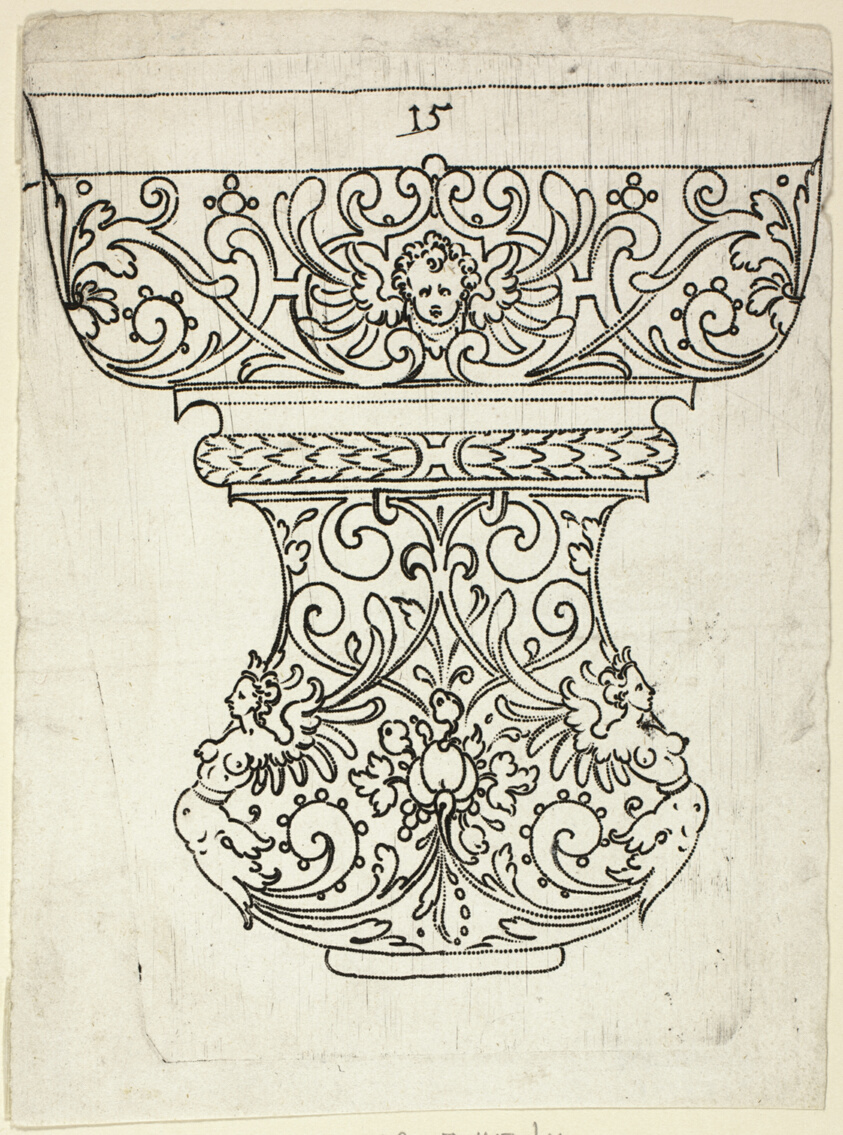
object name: Print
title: Plate 15, from XX Stuck zum (ornamental designs for goblets and beakers)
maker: Master A.P. (German, active early 17th century)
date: 1601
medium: Punch engraving in black on ivory laid paper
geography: Germany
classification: engraving; print; prints and drawing